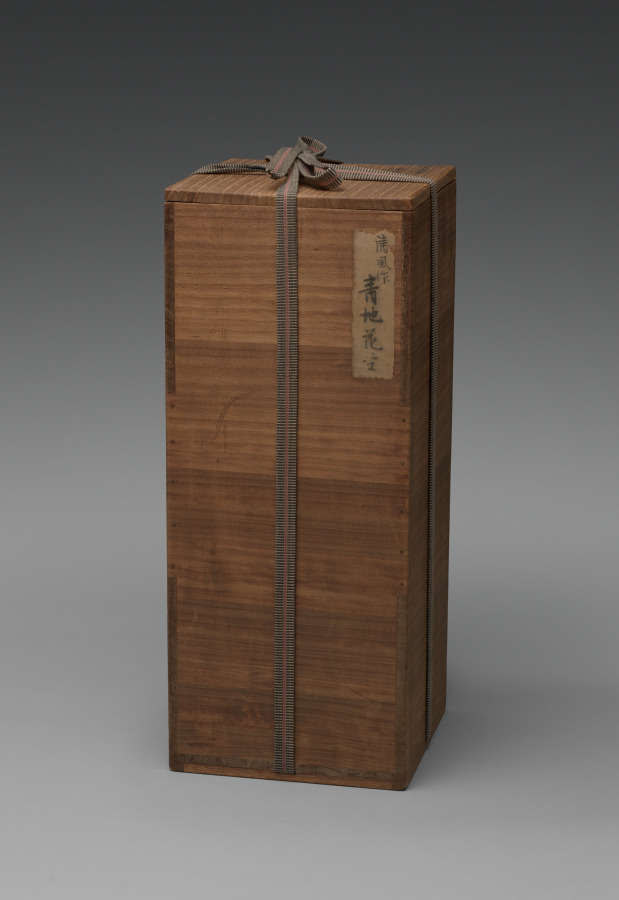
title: Flower Vase with Butterflies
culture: Japan, Meiji period (1868–1912)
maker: Seifū Yohei III (Japanese, 1851–1914)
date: 1907–14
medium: Porcelain with green glaze and carved and molded design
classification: Ceramic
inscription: 清風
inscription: 【印】 帝室技芸員。 【印】 清風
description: This flower vase has two pairs of butterflies forming low-relief roundels, one on each side. The butterflies face each other, one positioned above and the other below, their antennae curling up to a centrally placed floral motif. In the spaces between the pairs of insects, additional raised floral designs are set within vinelike extensions reminiscent of open metalwork banners and canopy adornments in Buddhist temples. The lip and the foot of the vase remain white, and the thinning of the green glaze within the higher-relief portions of the body decoration accentuates the designs. This work, like the sweets bowl CMA 2022.232, has a box lid attribution to Yohei III by Yohei IV. His inscription is dated to the autumn of 1919.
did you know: The box identifies the vase as in the hisokuyō (Chinese mise yao 秘色窯), or “mysterious color ware,” style.